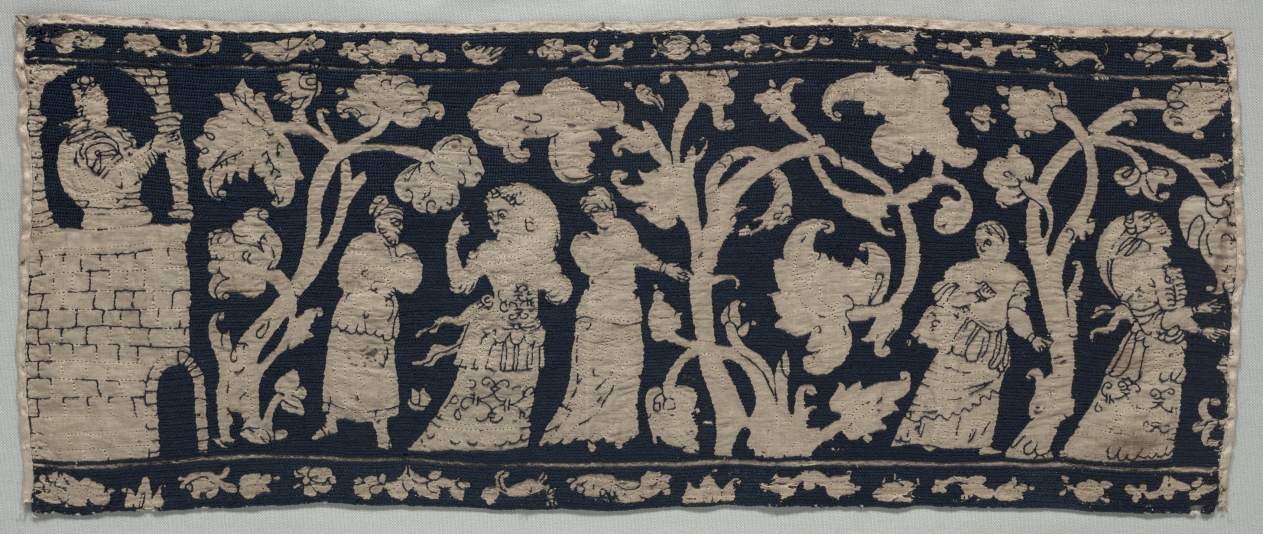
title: Embroidered Border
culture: Italy, 16th-17th century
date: 1500s-1600s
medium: embroidery; silk on linen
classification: Embroidery